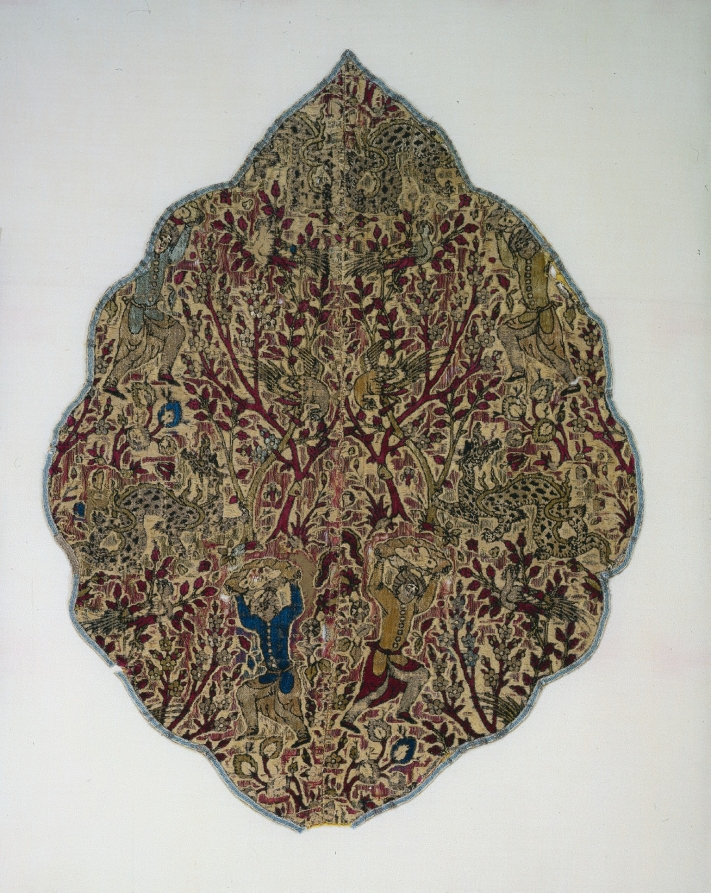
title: Tent panel of a dragon slayer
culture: Iran, Yazd[?], reign of Shah Tahmasp, Safavid period (1501-1736)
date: 1550–99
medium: velvet, cut, voided, brocaded, and pile-warp substitution: silk and gilt-metal strips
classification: Velvet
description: Iranian luxury textiles of the 16th and 17th centuries are renowned for representing human figures and for creating the most colorful velvets ever woven. Here, a dragon slayer dressed in 16th-century court attire is poised to hurl a boulder at a snarling dragon in a landscape with blossoming fruit trees and perched fowl. Even with faded silk pile this velvet contains many nuanced tones. As many as 12 colors of velvet pile were achieved by weavers who skillfully replaced colored pile warp during weaving. This velvet medallion decorated the interior of an imperial tent, possibly donated by Shah Tahmasp to an Ottoman Turkish sultan. Captured after the Ottoman siege of Vienna in 1683, the medallion was claimed as war booty by the European commander-in-chief Prince Sanguszko of Poland by whose name this and other panels are known.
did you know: Originally the ivory ground was covered with costly gilt-metal strips, which may have been removed for their monetary value.